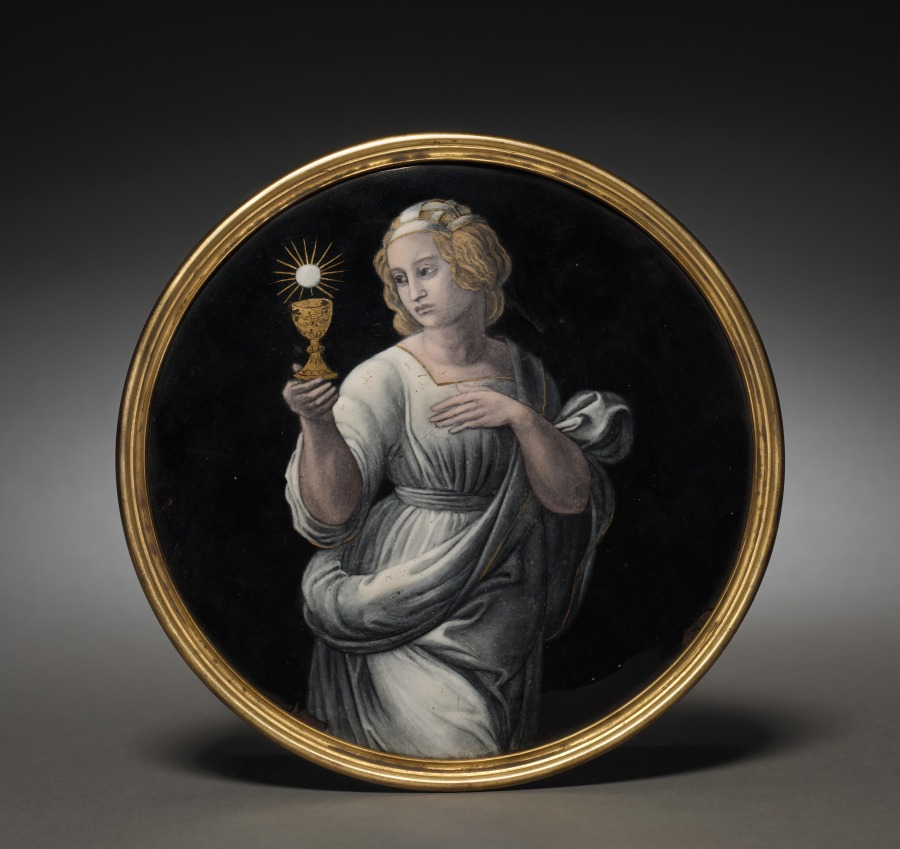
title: Circular Enamel Plaque with Figure of Ecclesia (?)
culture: France, style of Limoges, style of 16th century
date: 16th century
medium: enamel on copper; mounted on molded brass frame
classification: Enamel